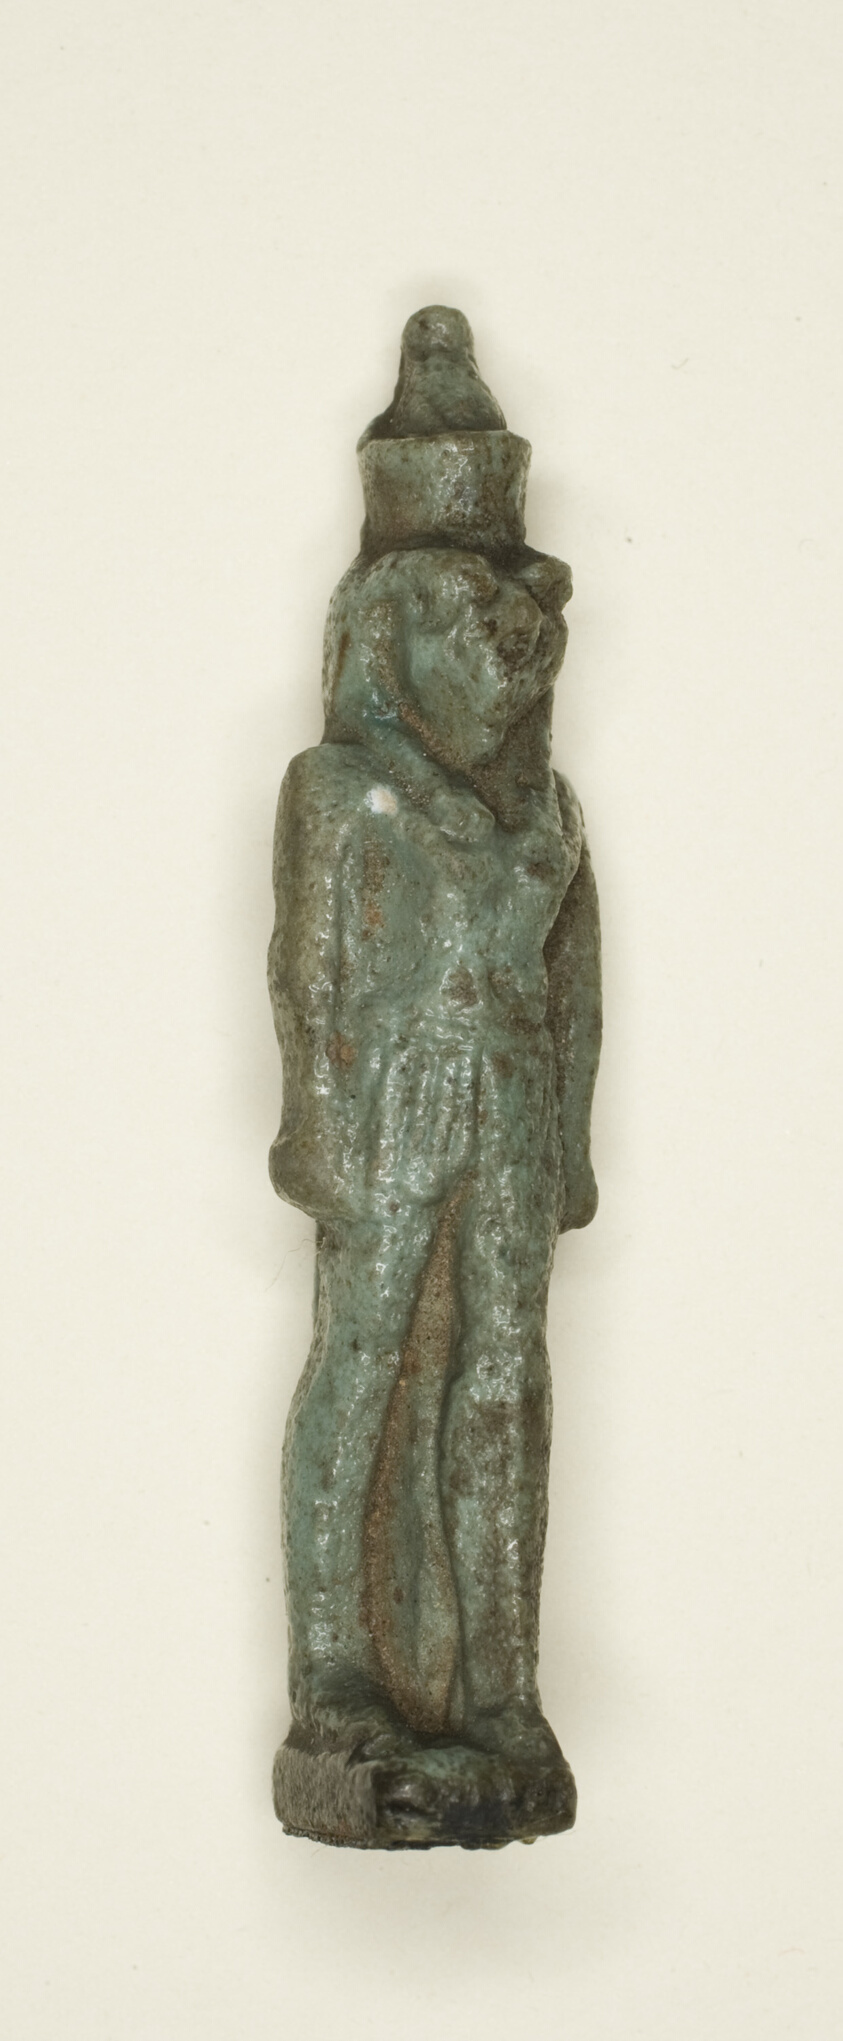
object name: Costume and Accessories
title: Amulet of the God Horus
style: third intermediate period, egyptian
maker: Egyptian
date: Third Intermediate Period, Dynasty 21–25 (1070–656 BCE)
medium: Faience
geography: Egypt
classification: amulet; jewelry; ceramics; ancient art; costume; faïence (composite material)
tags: gods (deities)